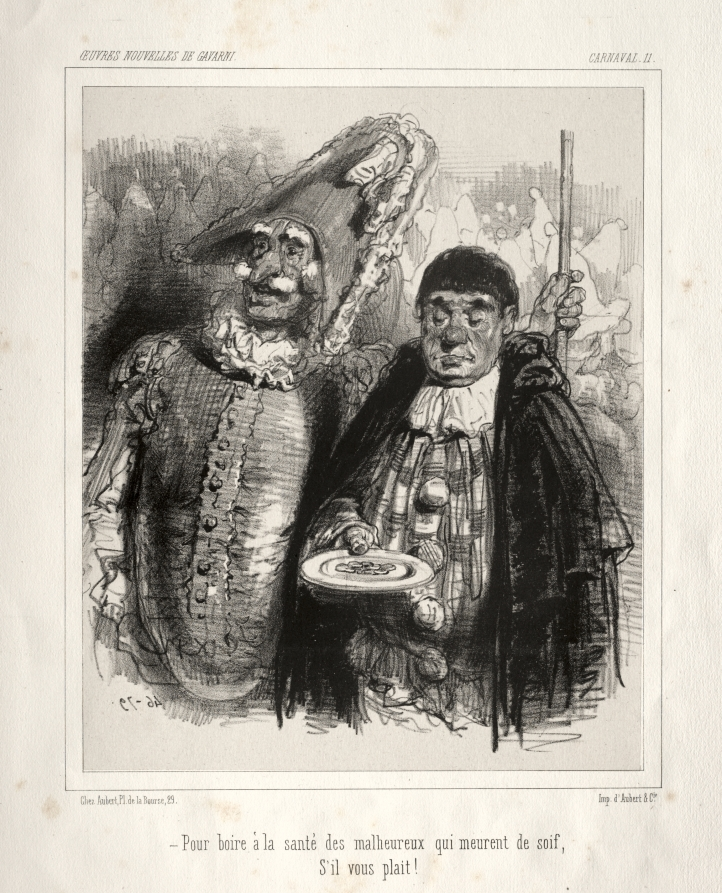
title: Carnaval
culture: France, 19th century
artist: Paul Gavarni (French, 1804–1866)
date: c. 1841–47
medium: lithograph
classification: Print